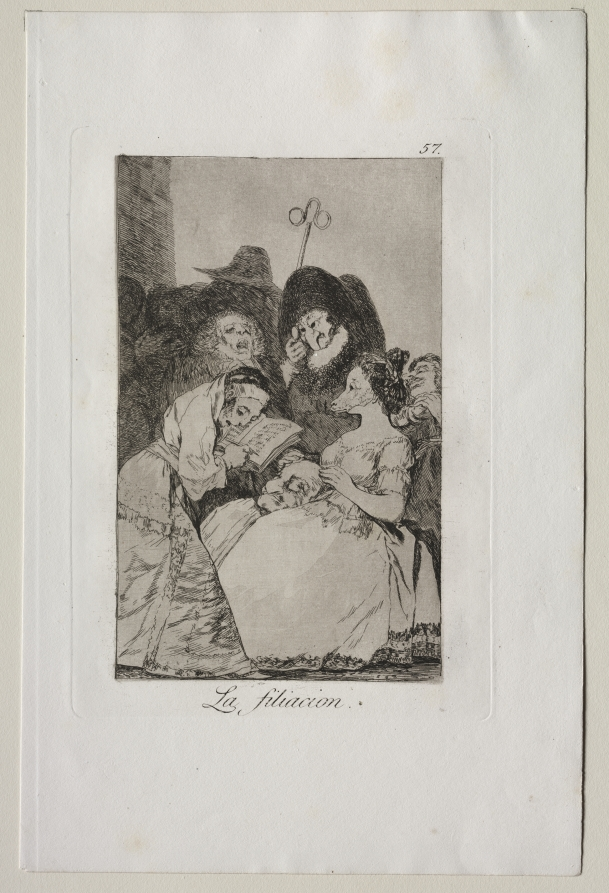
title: The Filiation, Plate 57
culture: Spain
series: Los Caprichos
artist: Francisco de Goya (Spanish, 1746–1828)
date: 1799, printed c. 1855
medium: etching and aquatint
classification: Print